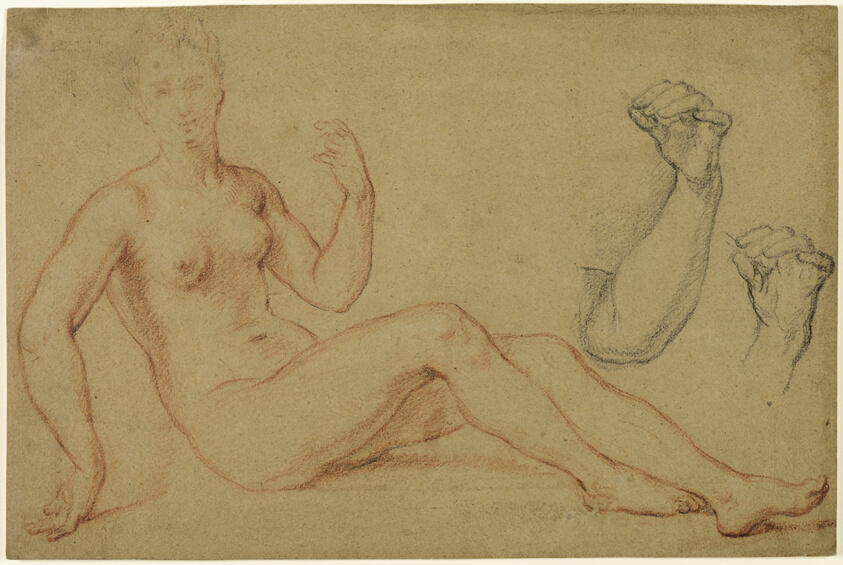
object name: Drawing and Watercolor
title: Seated Female Nude with Sketch of Hand and Sketch of Forearm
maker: Louis de Boullogne, the elder (French, 1609-1674)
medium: Red and black chalk on tan wove paper, laid down on ivory laid paper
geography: France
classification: chalk; drawings (visual works); prints and drawing